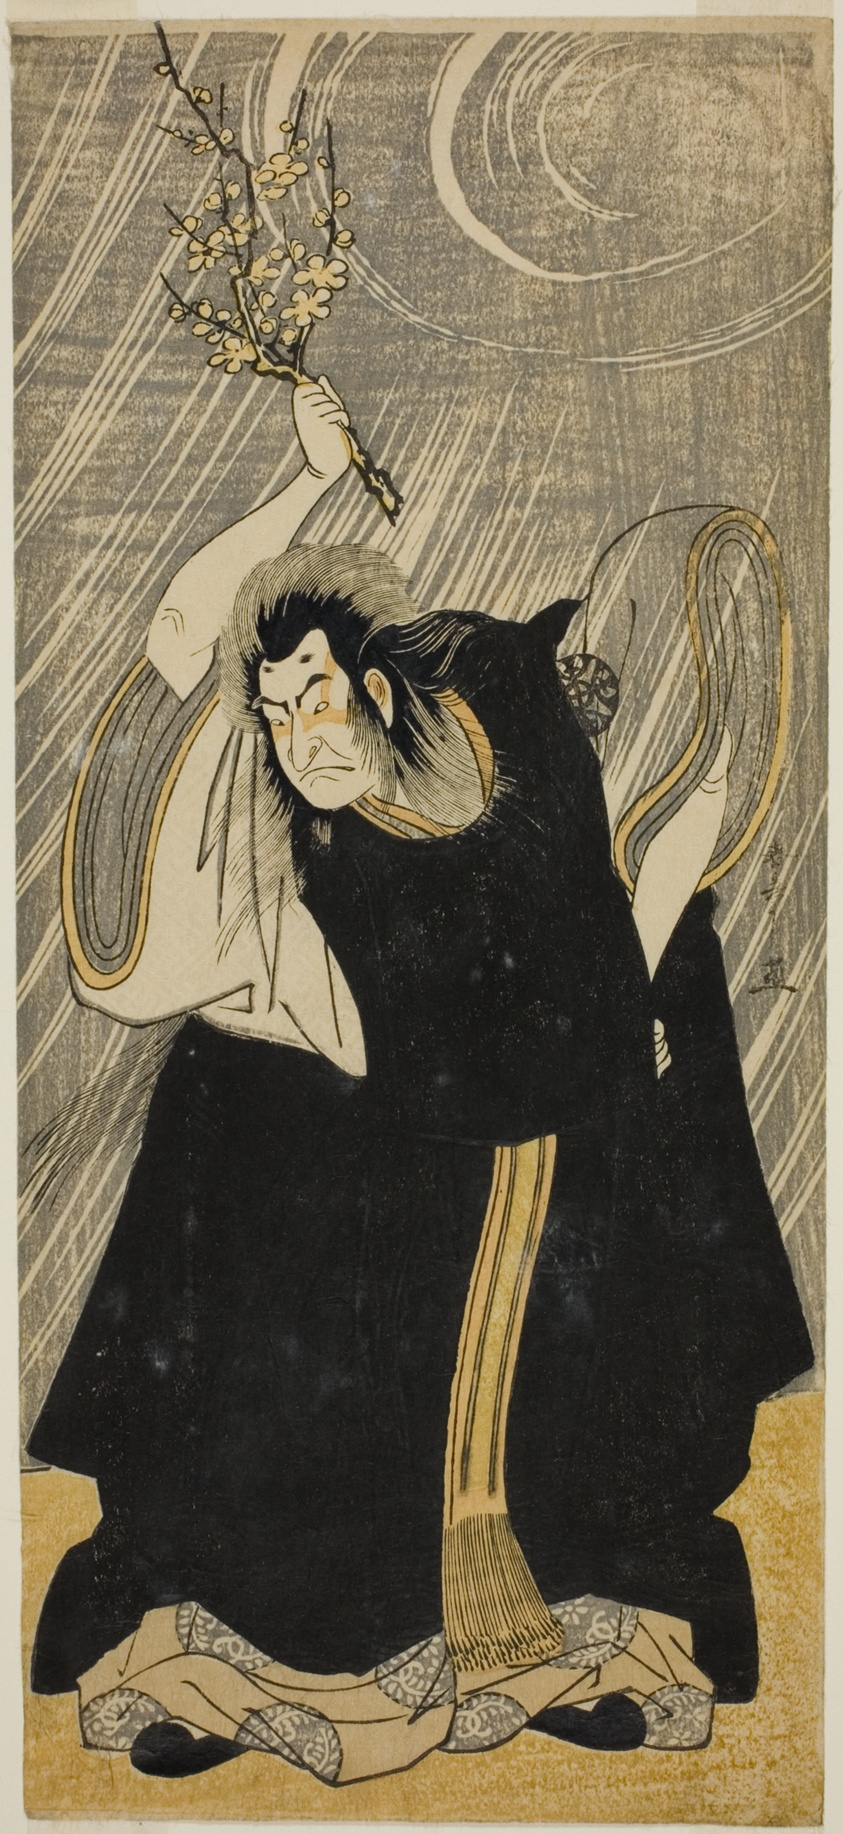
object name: Print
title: The Actor Nakamura Nakazo I as the thunder god, an incarnation of Kan Shojo, in the play "Sugawara Denju Tenarai Kagami," performed at the Morita Theater in the third month, 1780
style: Japanese (culture or style)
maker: Katsukawa Shunsho 勝川 春章; Japanese, 1726-1792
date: c. 1780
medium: Color woodblock print; hosoban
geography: Japan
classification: woodblock print; print; asian art